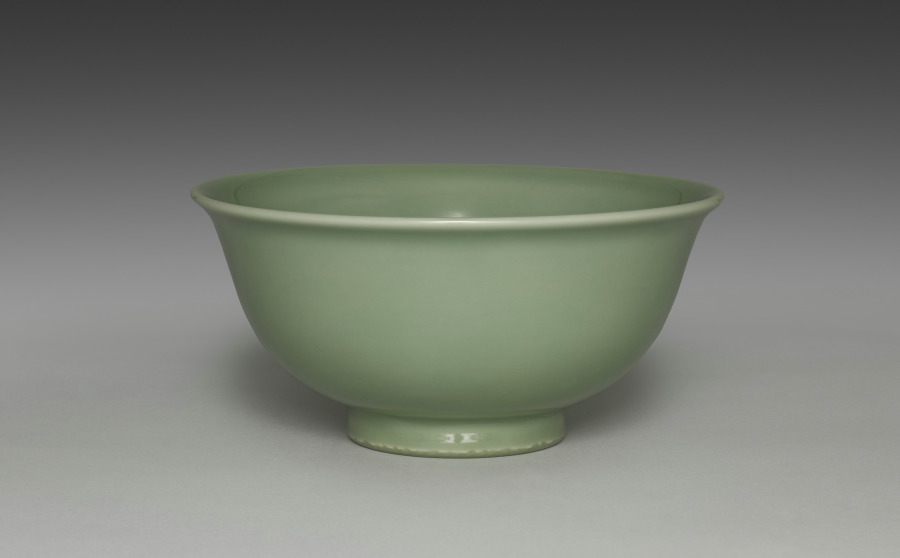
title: Dining Bowl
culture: Japan, Meiji period (1868–1912)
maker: Seifū Yohei III (Japanese, 1851–1914)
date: 1912–14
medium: Porcelain with green glaze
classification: Ceramic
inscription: 共箱の箱書：（蓋表）秘色彩古磁盂（印：清風）；（蓋裏）清風制之（印：帝室技藝員）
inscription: 彫銘：清風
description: This Yohei III dining bowl with an everted rim has a glaze identified in its box lid inscription as hisoku (C. mise), or “mysterious color.” This name typically refers specifically to a type of high-quality, green-glazed ceramic produced in the ninth and tenth centuries at the Yue kilns in China’s Zhejiang Province as tribute ware for the imperial family.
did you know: Many ceramics created by the Seifū Studio refer to and emulate Chinese ceramics in form and glazing.